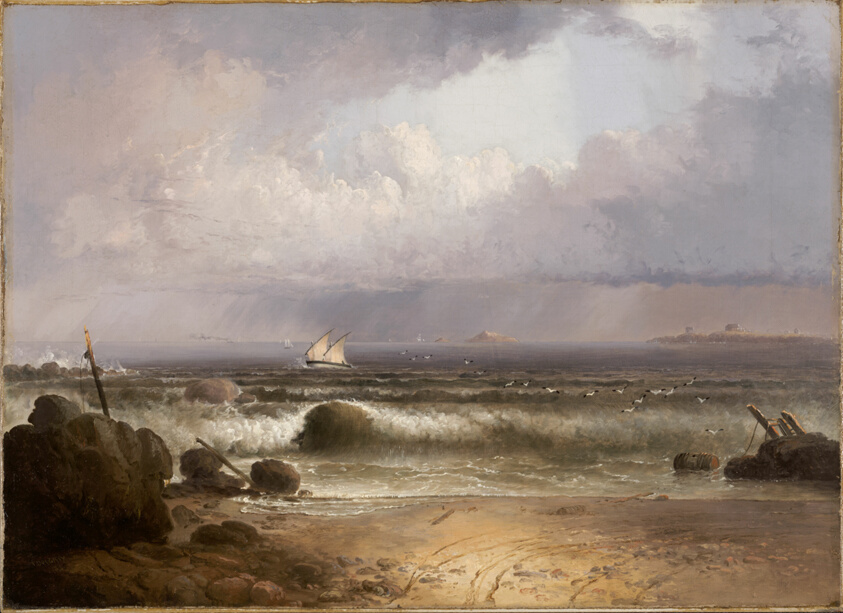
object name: Painting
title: Coming Squall (Nahant Beach with a Summer Shower)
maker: Thomas Doughty (American, 1793–1856)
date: 1835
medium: Oil on canvas mounted on cradled panel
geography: United States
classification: painting; oil on canvas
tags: landscapes